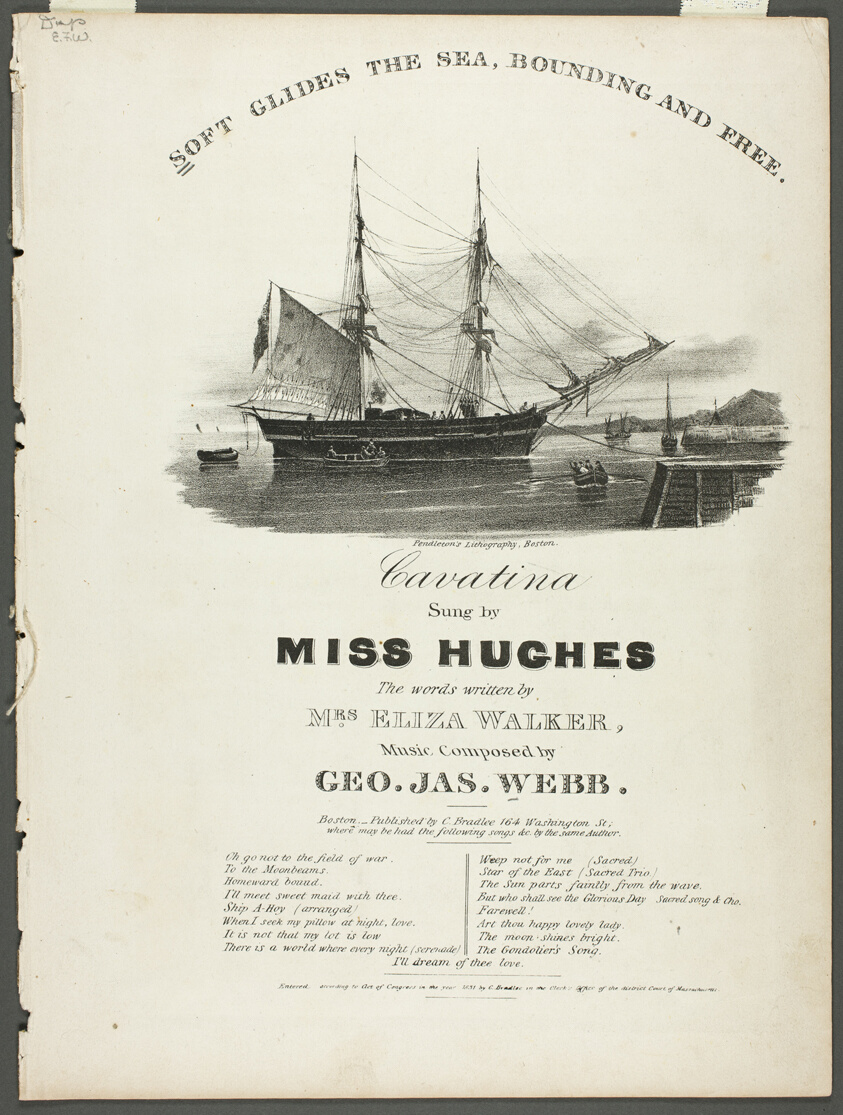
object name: Print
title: Soft Glides the Sea, Bounding and Free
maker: Robert Salmon (American, born England, c. 1775-c. 1844)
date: 1837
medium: Lithograph on cream wove paper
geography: United States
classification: lithograph; print; prints and drawing